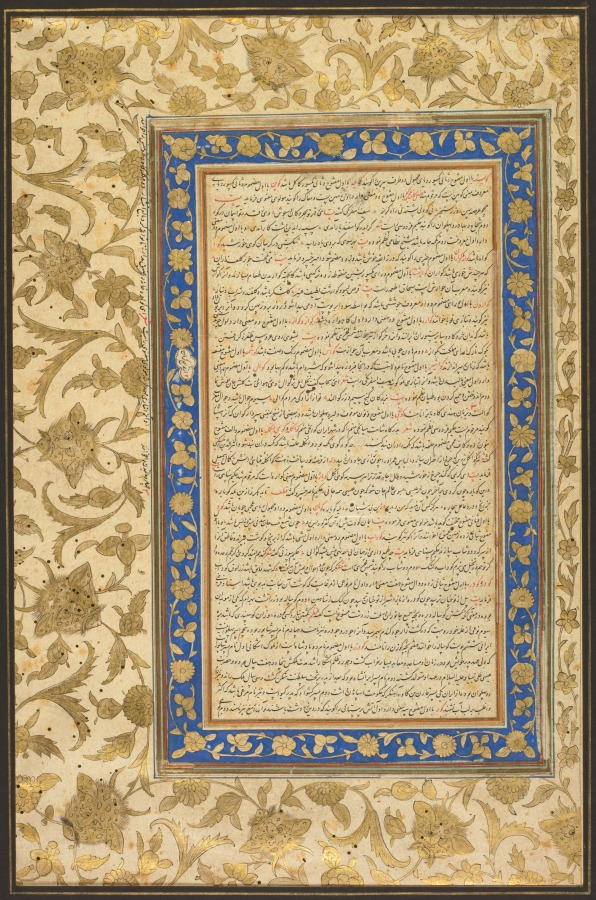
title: An Illuminated Folio from the Royal Manuscript of the Farhang-i Jahangiri (recto)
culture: Mughal India, court of Jahangir (1605–1627)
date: 1607–8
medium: Gum tempera, ink, and gold on paper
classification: Painting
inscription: Recto: “kuyesteh” (misspelling of “kunisteh,” meaning two halves of the buttocks) to “Gur” (name of a people in India)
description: Farhang-E Jahāngīrī, one of the most complete and authoritative dictionaries of the Persian language, was compiled by Mir Jamal al-Din Husayn Inju. It took him twelve years to compile over 9,000 words with definitions and examples from verses by Persian poets. He was born in Shiraz, Iran, but lived most of his life in Agra, India, so the dictionary was named honor of the Mughal emperor Jahangir, who reigned from 1605 to 1627.